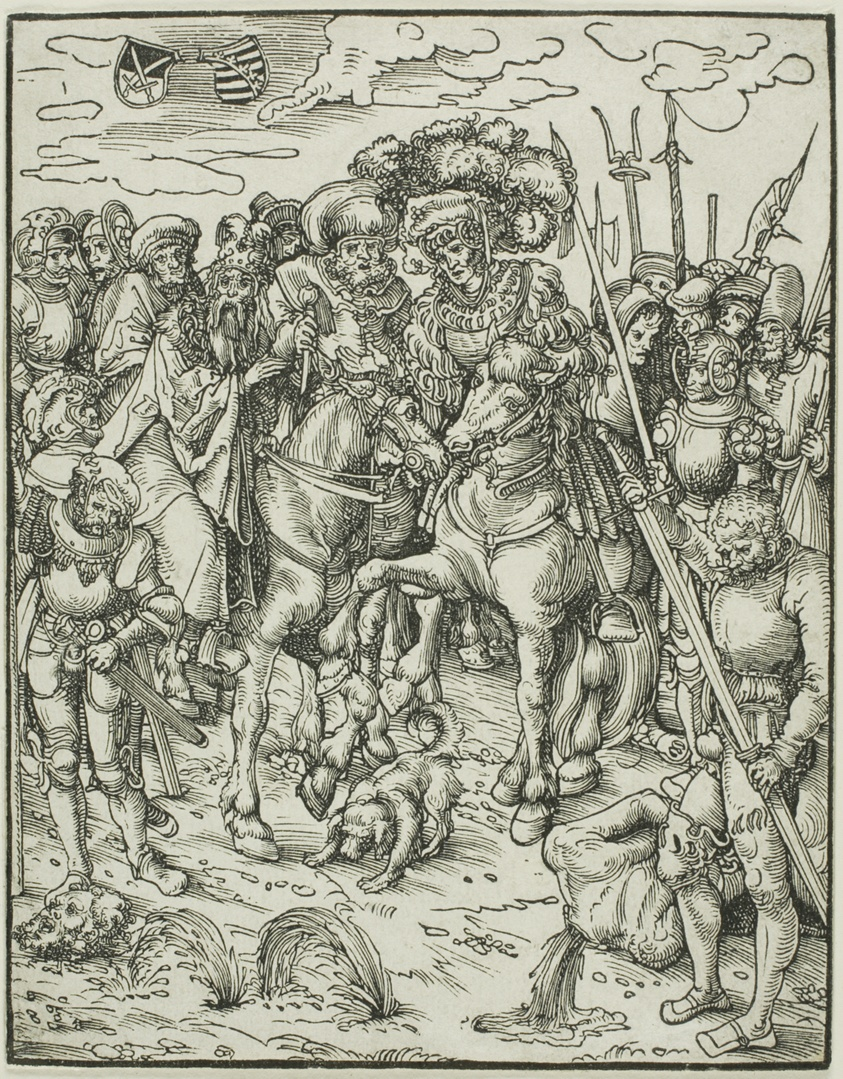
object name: Print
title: Saint Paul, from The Martyrdom of the Apostles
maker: Lucas Cranach the Elder (German, 1472-1553)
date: c. 1512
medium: Woodcut in black on ivory laid paper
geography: Germany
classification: woodcut; print; prints and drawing